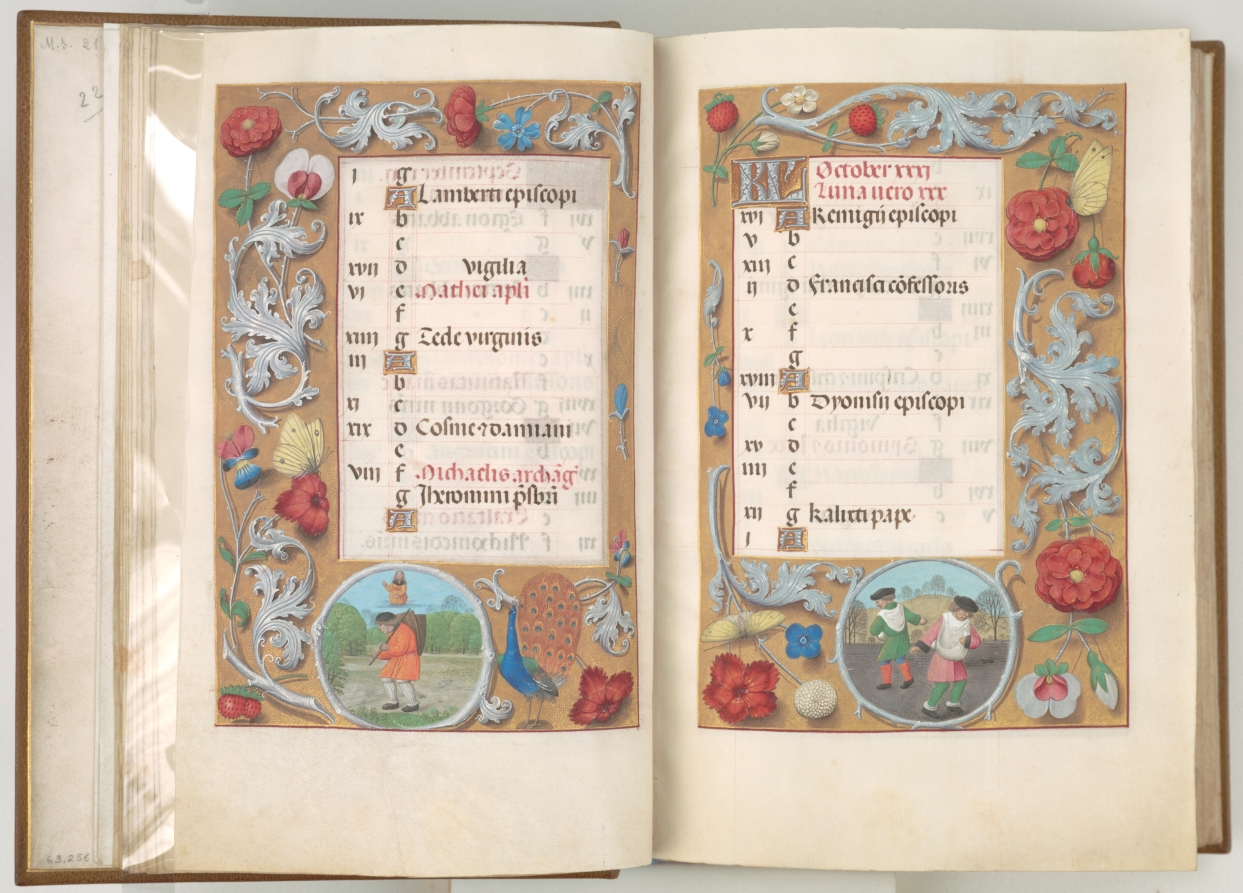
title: Hours of Queen Isabella the Catholic, Queen of Spain: Fol. 10v, September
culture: Flanders, Ghent and Bruges, late 15th century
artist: Master of the First Prayerbook of Maximillian (Flemish, c. 1444–1519)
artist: and Associates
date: c. 1500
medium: ink, tempera, and gold on vellum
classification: Bound Volume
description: This manuscript was illuminated by a circle of at least five highly organized manuscript painters active in the Flemish cities of Ghent and Bruges. The principal illuminator was Alexander Bening, who painted the majority of the book's miniatures. Manuscripts produced by this circle of artists are renowned for the decoration of their borders, which typically feature a rich variety of realistically-painted flowers, birds, and butterflies. This prayer book, called a book of hours, was intended not for a cleric, but for the private devotions of a lay person-in this case, Isabella the Catholic, Queen of Spain (1451-1504). Isabella's coat of arms embellishes the book's frontispiece. It is unlikely that the book was commissioned by the Queen herself; rather, she probably received it as a diplomatic gift from someone courting her patronage, perhaps Cardinal Francisco Jimenez de Cisneros. A Franciscan friar, Jimenez was dependent upon Isabella for his advancement, first to the post of Queen's confessor in 1492, and then to Archbishop of Toledo in 1495.